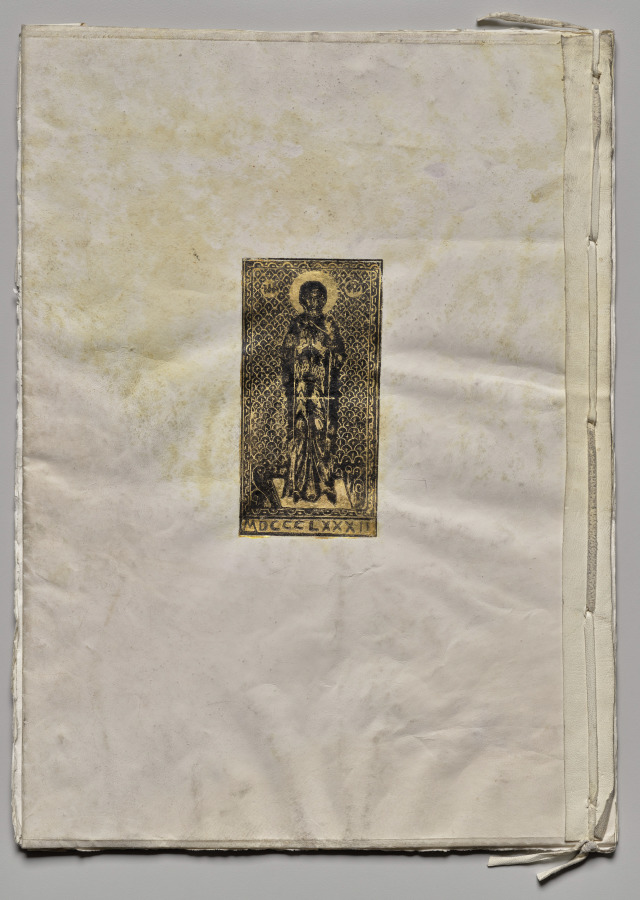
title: Etchings of Venice: Cover and Title Page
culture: America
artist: Otto H. Bacher (American, 1856–1909)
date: 1882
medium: etching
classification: Print